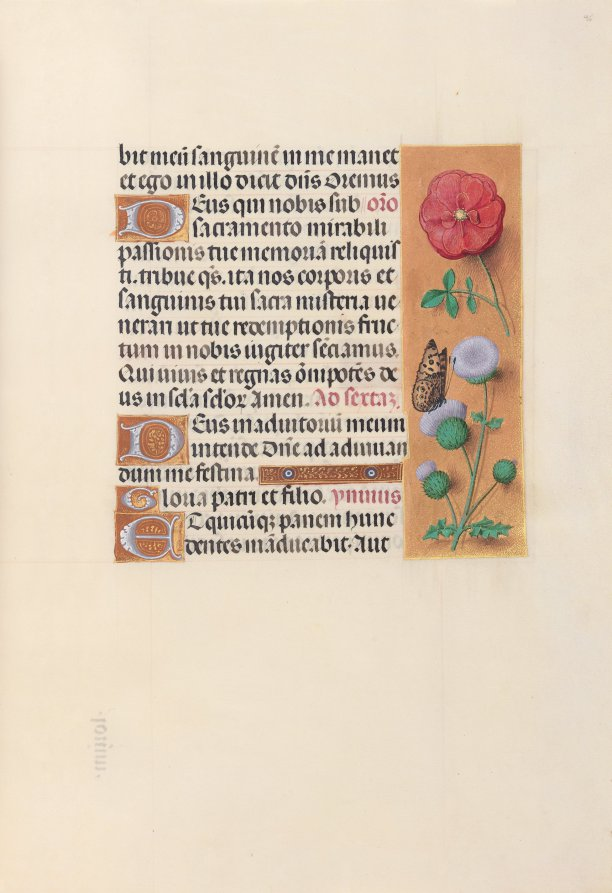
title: Hours of Queen Isabella the Catholic, Queen of Spain: Fol. 46r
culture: Flanders, Ghent and Bruges, late 15th century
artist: Master of the First Prayerbook of Maximillian (Flemish, c. 1444–1519)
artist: and Associates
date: c. 1500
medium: ink, tempera, and gold on vellum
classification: Bound Volume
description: This manuscript was illuminated by a circle of at least five highly organized manuscript painters active in the Flemish cities of Ghent and Bruges. The principal illuminator was Alexander Bening, who painted the majority of the book's miniatures. Manuscripts produced by this circle of artists are renowned for the decoration of their borders, which typically feature a rich variety of realistically-painted flowers, birds, and butterflies. This prayer book, called a book of hours, was intended not for a cleric, but for the private devotions of a lay person-in this case, Isabella the Catholic, Queen of Spain (1451-1504). Isabella's coat of arms embellishes the book's frontispiece. It is unlikely that the book was commissioned by the Queen herself; rather, she probably received it as a diplomatic gift from someone courting her patronage, perhaps Cardinal Francisco Jimenez de Cisneros. A Franciscan friar, Jimenez was dependent upon Isabella for his advancement, first to the post of Queen's confessor in 1492, and then to Archbishop of Toledo in 1495.